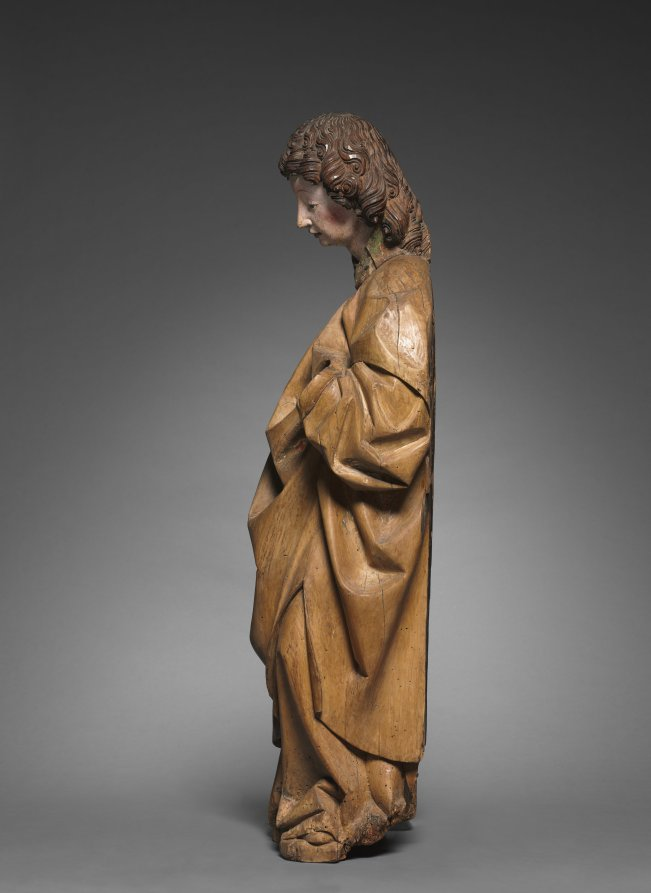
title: Saint Lawrence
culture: Austria, South Tyrol, late 15th century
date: c. 1490–1500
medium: lindenwood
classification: Sculpture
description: Lawrence of Rome (about 225–258 CE) was one of the seven deacons of ancient Rome martyred in 258 CE, and became one of the most widely venerated saints during the Middle Ages. According to tradition, he met his martyrdom by being roasted on a gridiron, an attribute which he either holds or stands upon in art. (See a depiction of him by Tilman Riemenschneider nearby in this gallery.) Lawrence is always portrayed as a young man wearing the deacon’s dalmatic. The original source and context of this sculpture is not known. Since it is not carved in the round, it was likely placed within the niche of a large altarpiece.